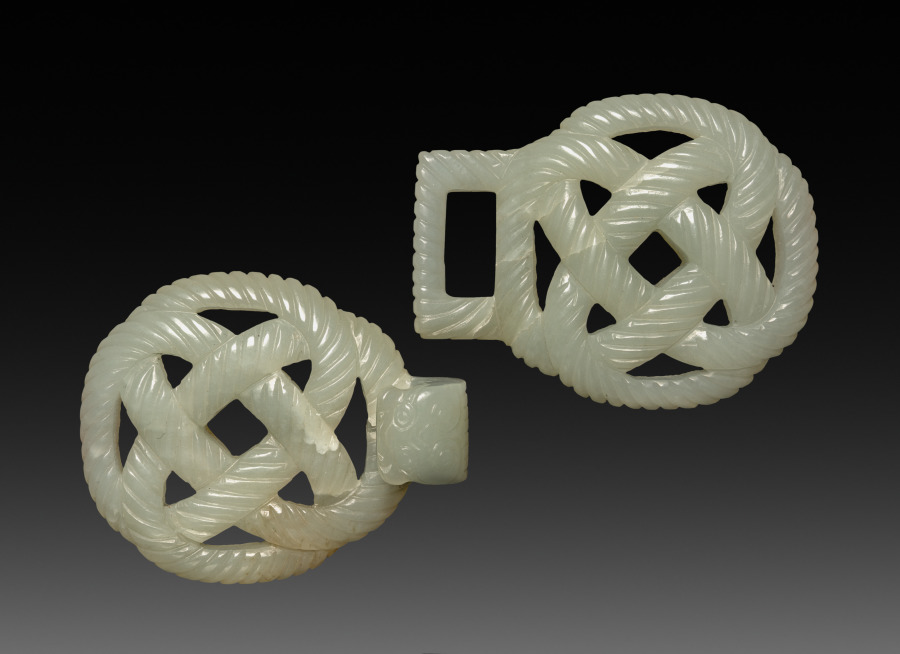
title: Buckle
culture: China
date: 1900s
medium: jade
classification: Jewelry